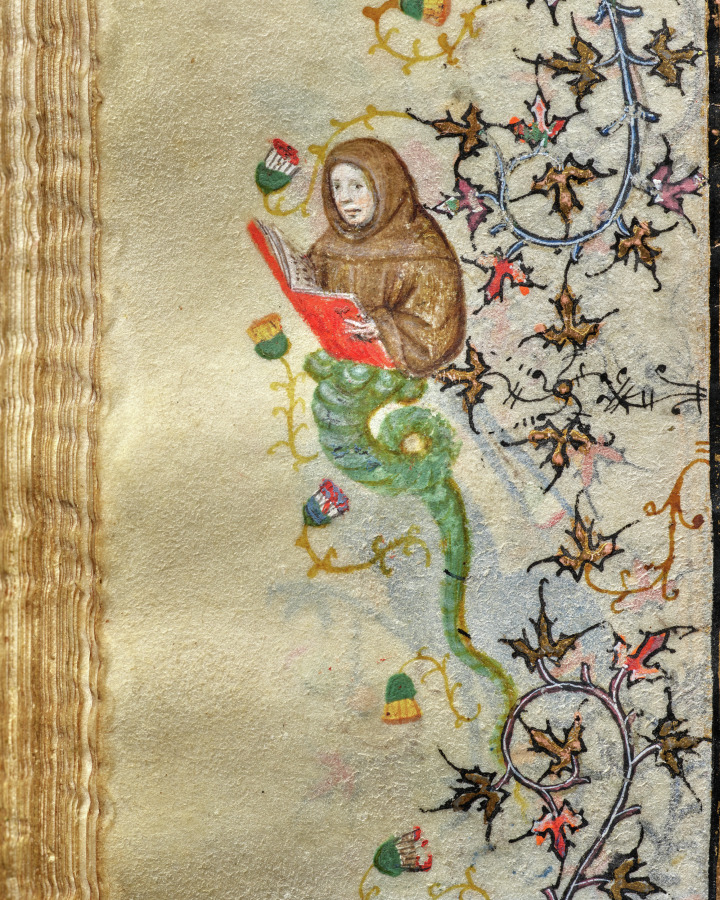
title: Hours of Charles the Noble, King of Navarre (1361-1425): fol. 121v, Text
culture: France, Paris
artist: Master of the Brussels Initials and Associates (French)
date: c. 1405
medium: ink, tempera, and gold on vellum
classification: Bound Volume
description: This precious volume was obviously highly prized by its owner, the French-born King of Navarre, who had his coat of arms painted on no less than twenty folios. Rather than directly commissioning this manuscript from a specific workshop, it seems that Charles the Noble acquired his book of hours -- perhaps ready-made for the luxury market -- while on a trip to Paris in 1404-05. A collaborative effort, six painting styles are evidenced within the pages of this codex, those of two Italians, two Frenchmen, and two Netherlanders. The painter who was responsible for the planning and decoration of the book, and who produced seventeen of the large miniatures, was a Bolognese artist known as the Master of the Brussels Initials. His principal assistant, responsible for most of the borders, was a Florentine who signed his name "Zecho" da Firenze on folio 208 verso.